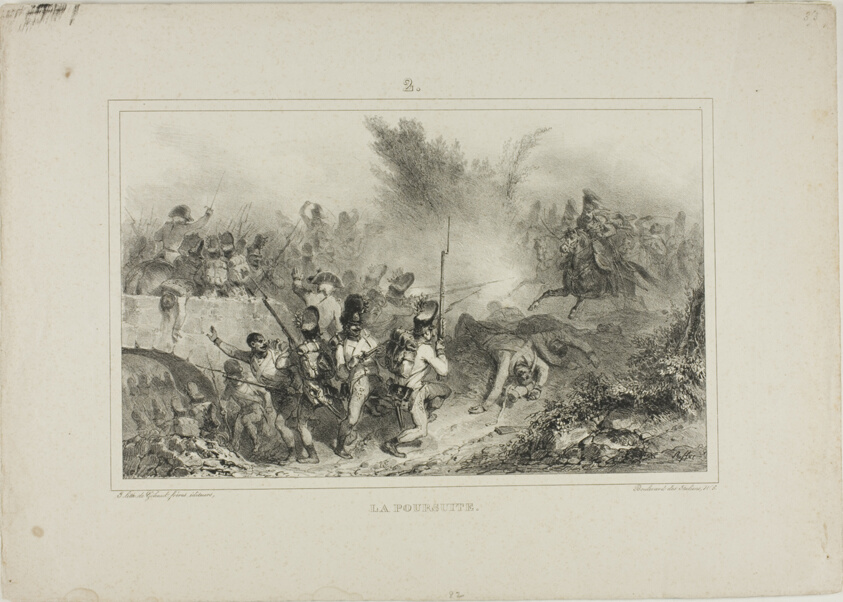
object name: Print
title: The Pursuit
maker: Denis Auguste Marie Raffet (French, 1804-1860); printed by Chez Gihaut Frères (French, 19th century)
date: 1832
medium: Lithograph in black on ivory wove paper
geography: France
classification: lithograph; print; prints and drawing